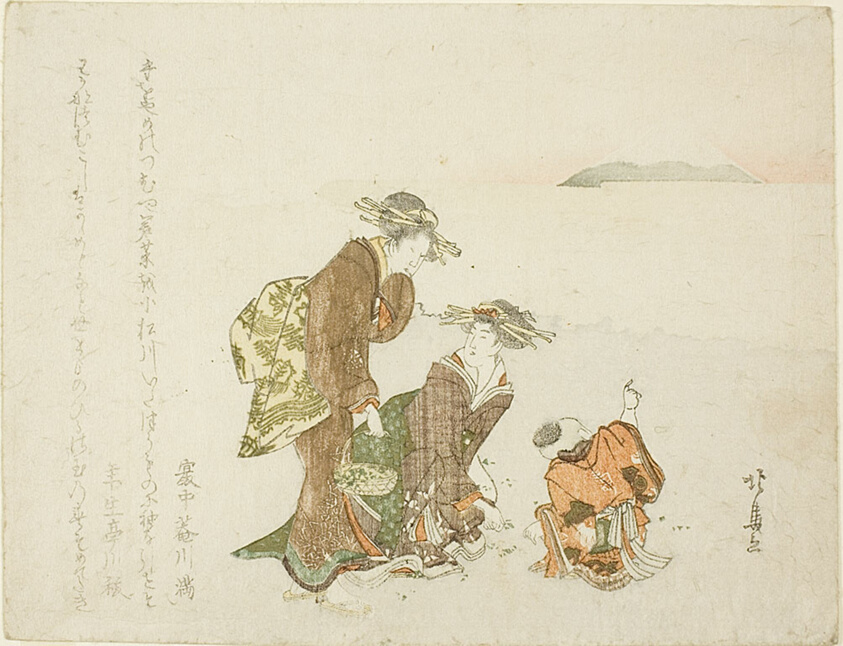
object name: Print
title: Two Girls and a Boy at the Shore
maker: Teisai Hokuba (Japanese, 1771–1844)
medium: Color woodblock print; surimono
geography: Japan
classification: print; asian art